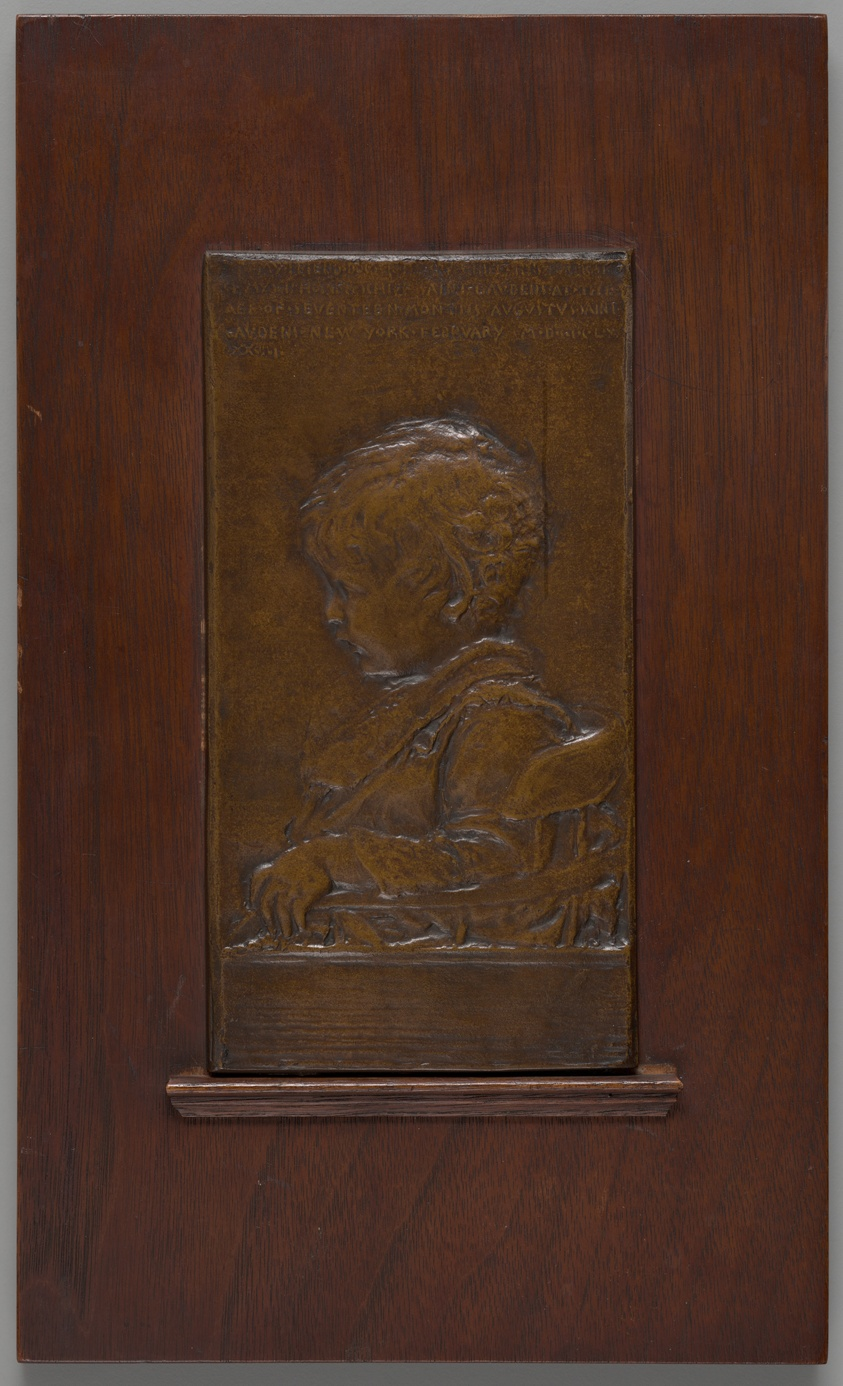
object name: Sculpture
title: Homer Schiff Saint-Gaudens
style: 19th century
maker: Augustus Saint-Gaudens (American, born Ireland, 1848–1907)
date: Modeled 1882, cast c. 1907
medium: Bronze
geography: United States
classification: sculpture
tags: portrait, portraits: child subject, portraits